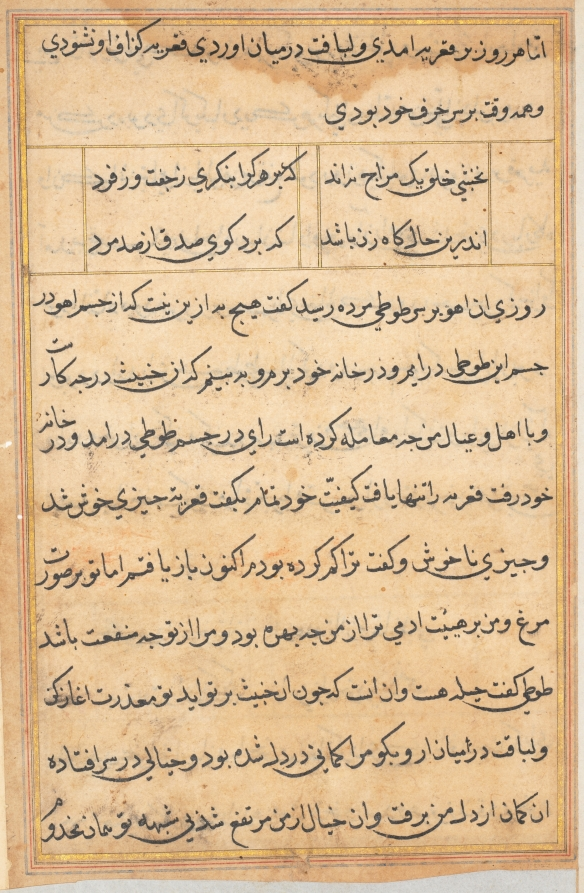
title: Page from Tales of a Parrot (Tuti-nama): text page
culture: Mughal India, court of Akbar (reigned 1556–1605)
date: c. 1560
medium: gum tempera, ink, and gold on paper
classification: Painting